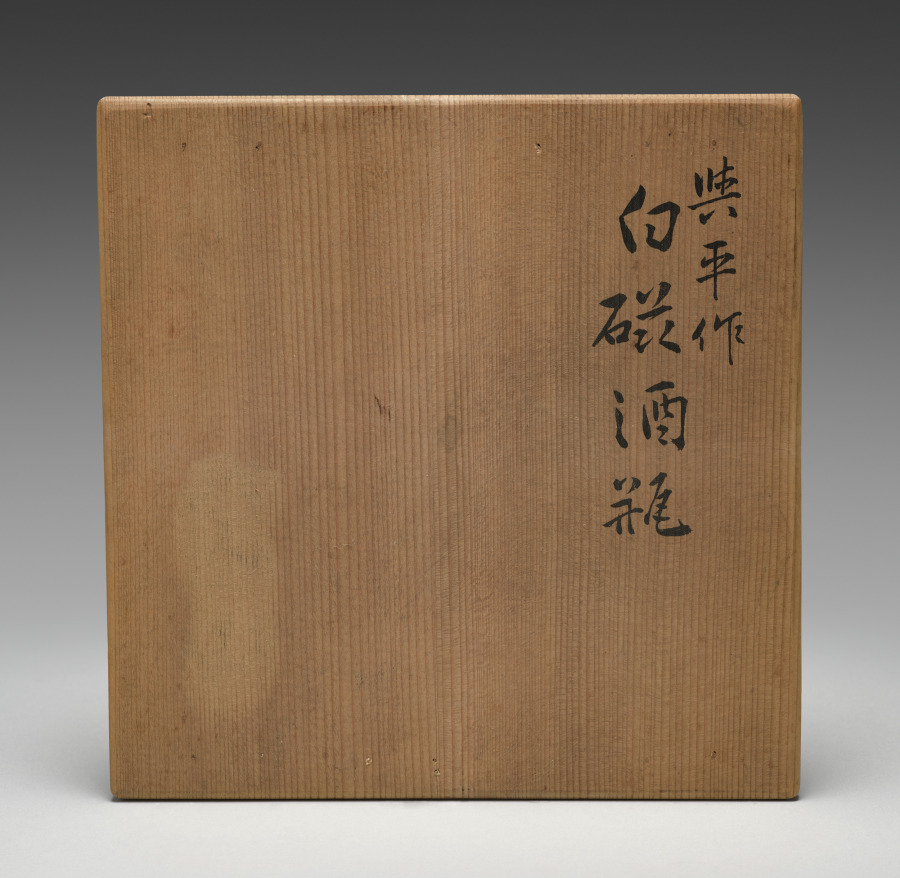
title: Sake Pourer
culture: Japan, Meiji period (1868–1912)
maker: Seifū Yohei III (Japanese, 1851–1914)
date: c. 1887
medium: Porcelain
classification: Ceramic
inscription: Artist's signature in underglaze blue on the base.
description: This sake pourer has a wide basin with a low foot; a generous spout open across the top half; a flat, round lid with a small knob recessed flush to the top of the container; and a tall, arched handle that meets the container where the top joins the basin at a sharp angle. This vessel is glazed but otherwise undecorated. Unlike the creamy white color of some Yohei III works, the white of this sake pourer has the bluish cast typical of porcelains produced in Kyoto.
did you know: Seifū Yohei III signed this sake pourer in underglaze blue on the base.